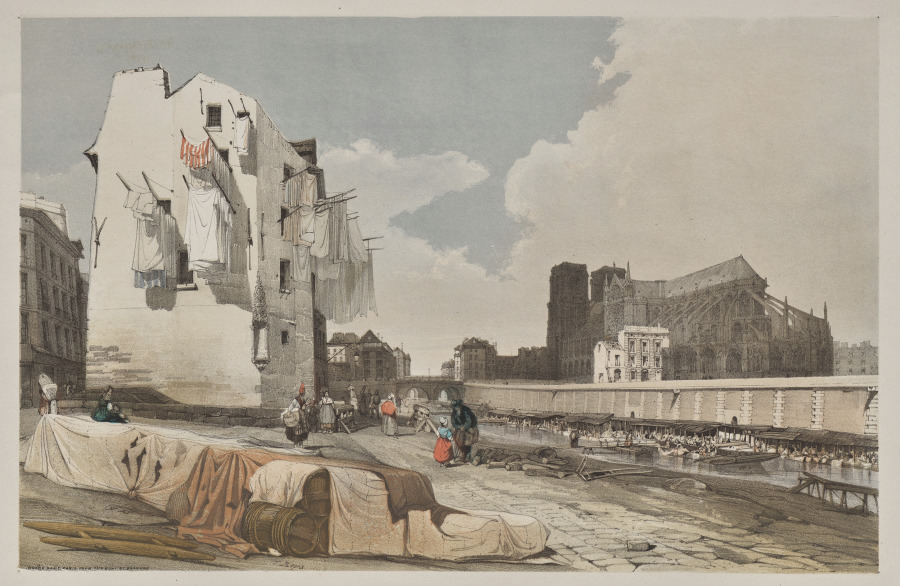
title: Picturesque Architecture in Paris, Ghent, Antwerp, Rouen: Nôtre Dame, Paris, from the Quai St. Bernard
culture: England, 19th century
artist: Thomas Shotter Boys (British, 1803–1874)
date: 1839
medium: lithograph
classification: Portfolio